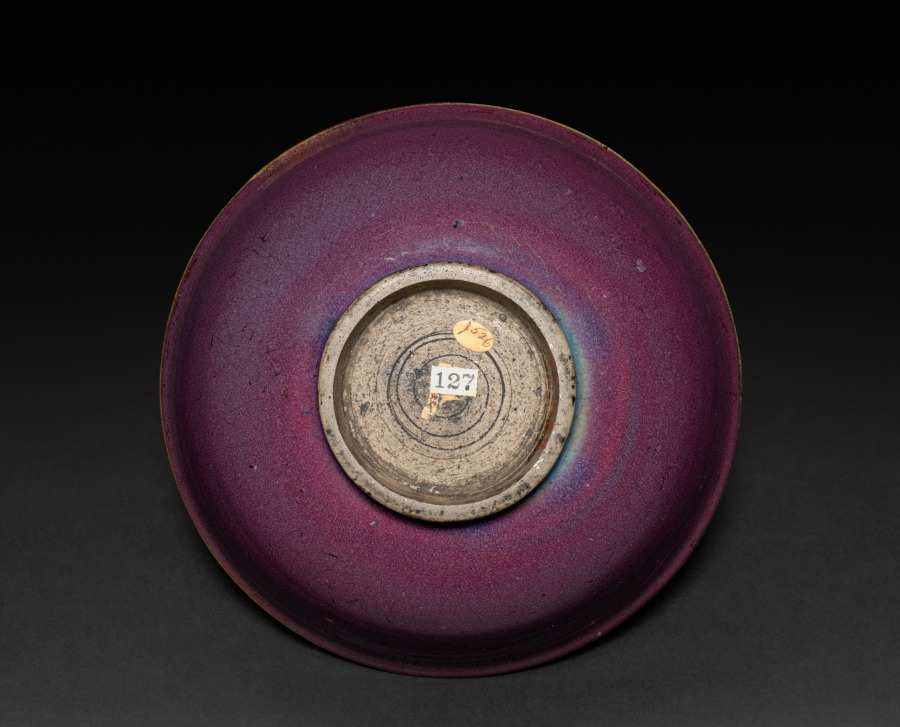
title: Bowl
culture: South China, Yuan dynasty (1271–1368) to Ming dynasty (1368–1644)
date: 1300s–1400s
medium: glazed gray stoneware, Jun ware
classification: Ceramic